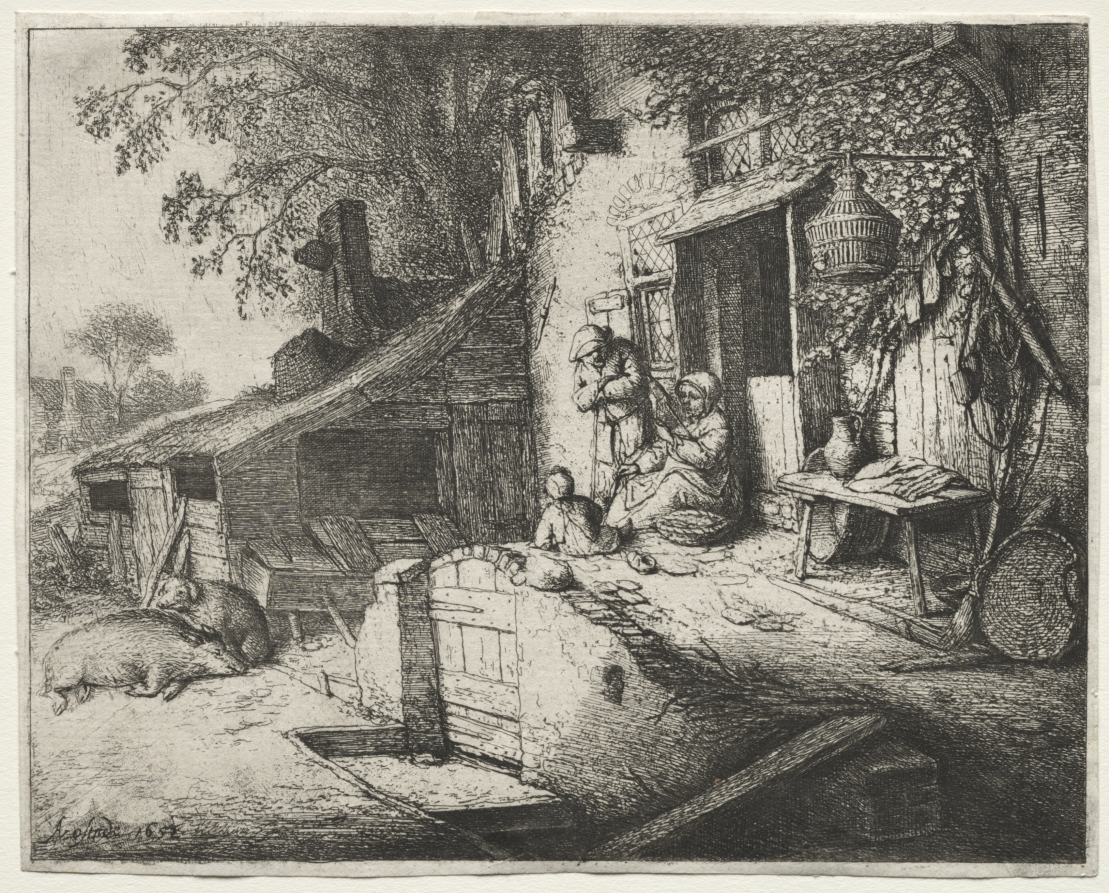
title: The Woman Spinning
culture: Netherlands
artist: Adriaen van Ostade (Dutch, 1610–1684)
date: 1652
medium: etching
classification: Print